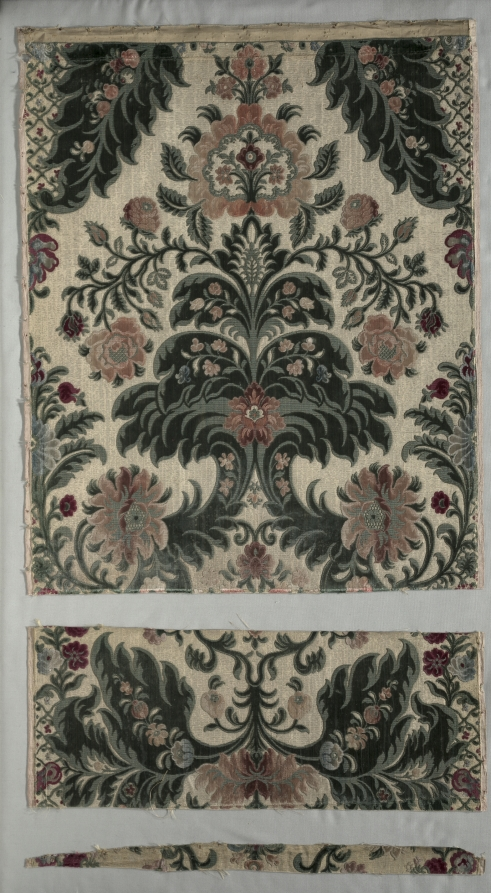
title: Fragments of Velvet (So-Called Velours Jardiniers)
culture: Italy, Genoa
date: 1600s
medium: velvet; silk and metallic thread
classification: Velvet